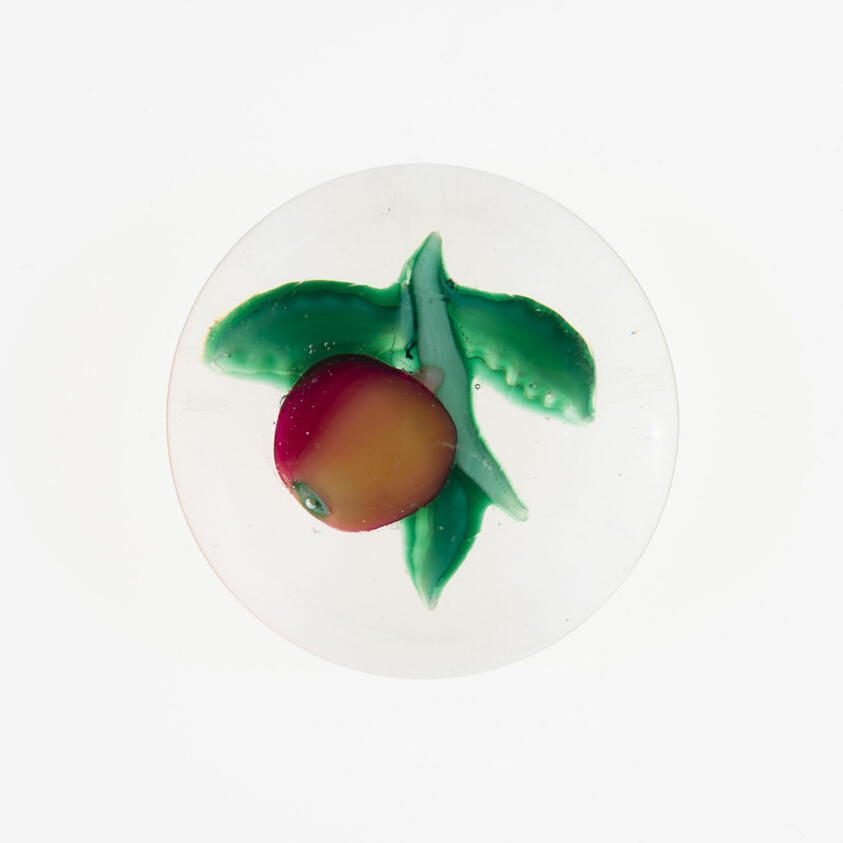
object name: Glass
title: Paperweight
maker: Baccarat Glassworks (Cristalleries de Baccarat); Lorraine, France, founded 1764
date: 19th century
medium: Glass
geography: Lunéville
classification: paperweight; lampwork; european decorative arts; glass